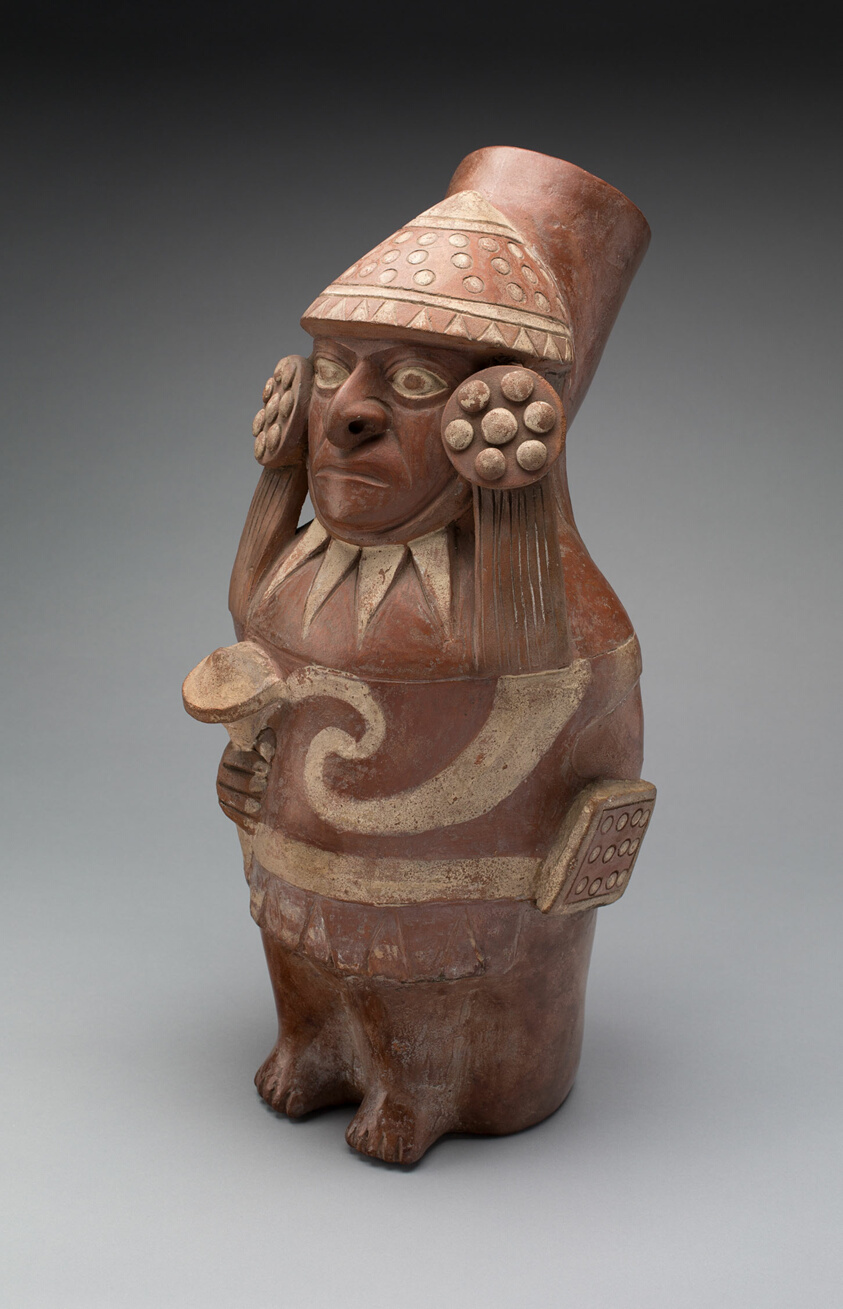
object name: Vessel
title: Jar in the Form of a Standing Figure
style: moche, mochica, early intermediate period, Pre-Columbian, americas, andes, Arts of the Americas, andean, south american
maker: Moche (North coast, Peru)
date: 100 BCE–500 CE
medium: Ceramic and pigment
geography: Peruvian North Coast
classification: earthenware; art of the americas; ceramics; vessel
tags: people, weapons, warriors, headdresses